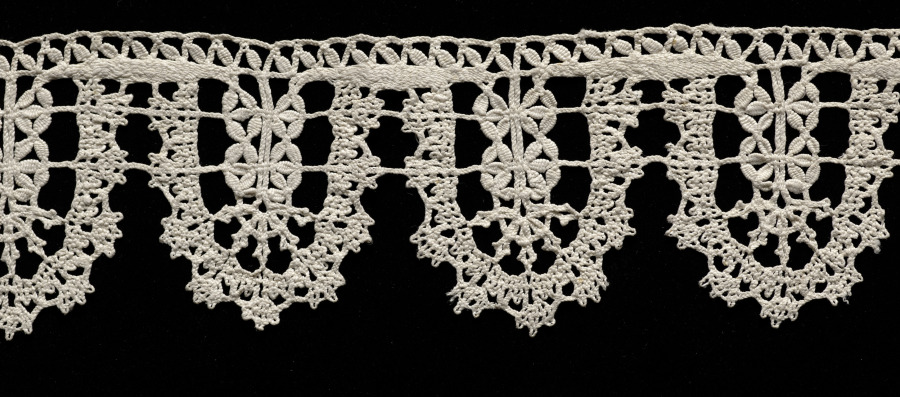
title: Lace Edging of Points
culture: Italy, Genoa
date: 1600s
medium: Bobbin lace (rose lace)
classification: Lace